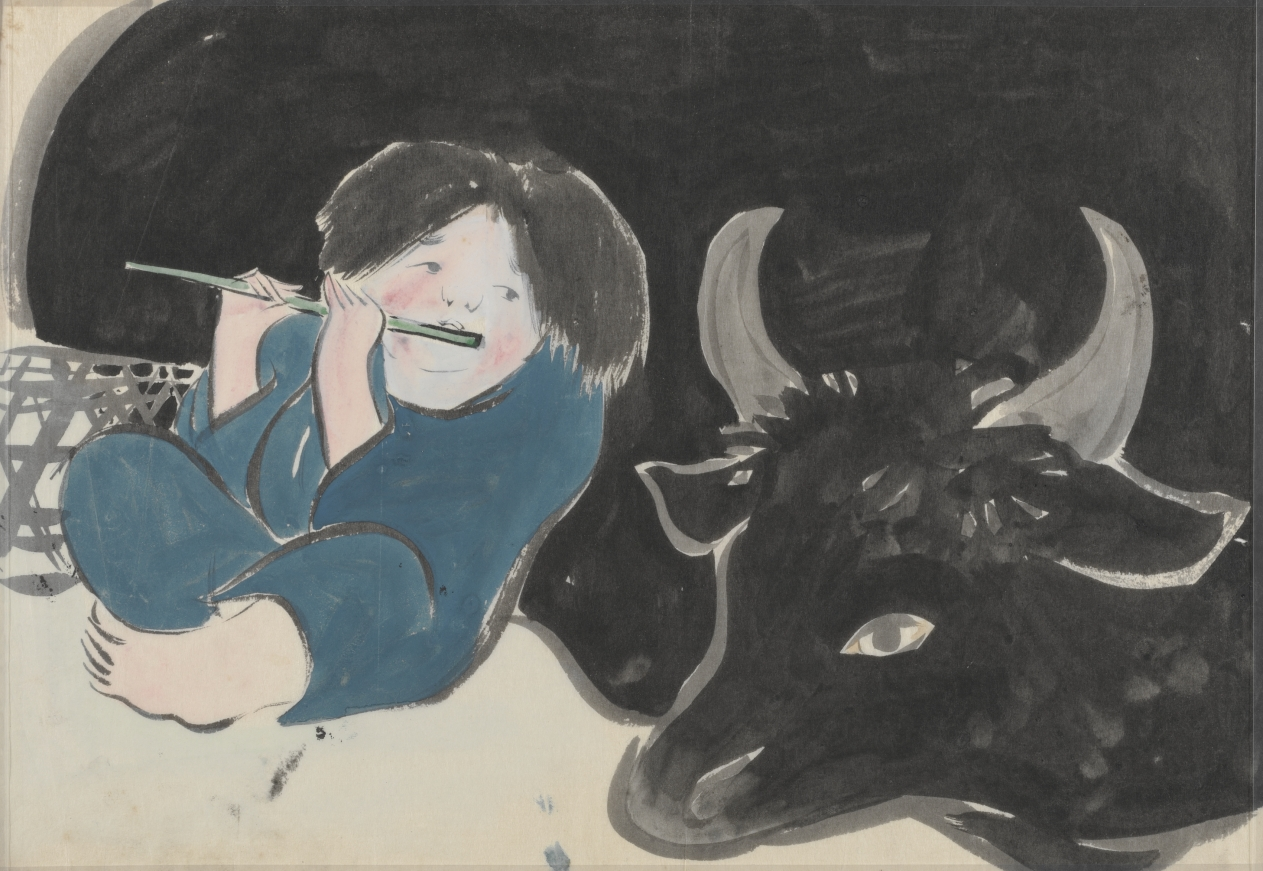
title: Flowers of a Hundred Worlds (Momoyogusa): Oxherd (Bokudo)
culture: Japan, Meiji period (1868–1912)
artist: Kamisaka Sekka (Japanese, 1866–1942)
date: 1909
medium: ink and color on paper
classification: Drawing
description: Kamisaka Sekka made preparatory drawings for his Flowers of a Hundred Worlds series on tracing paper with ink and color. The freehand sketches are much looser than the finished, printed compositions.